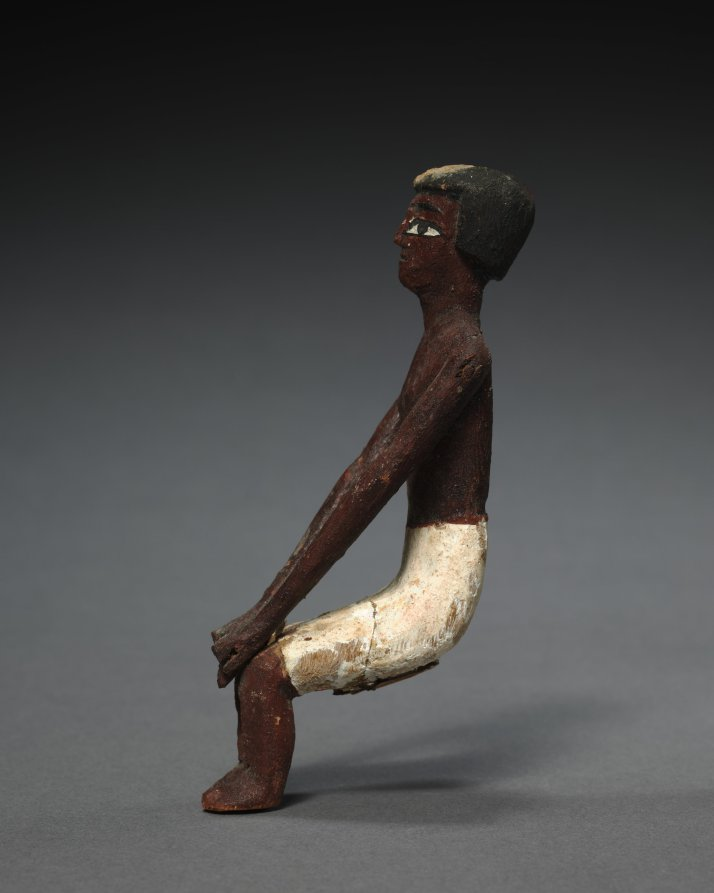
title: Seated Model Sailor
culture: Egypt, Middle Kingdom (2040–1648 BCE), Dynasties 11–12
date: c. 2000–1000 BCE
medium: painted sycamore fig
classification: Funerary Equipment